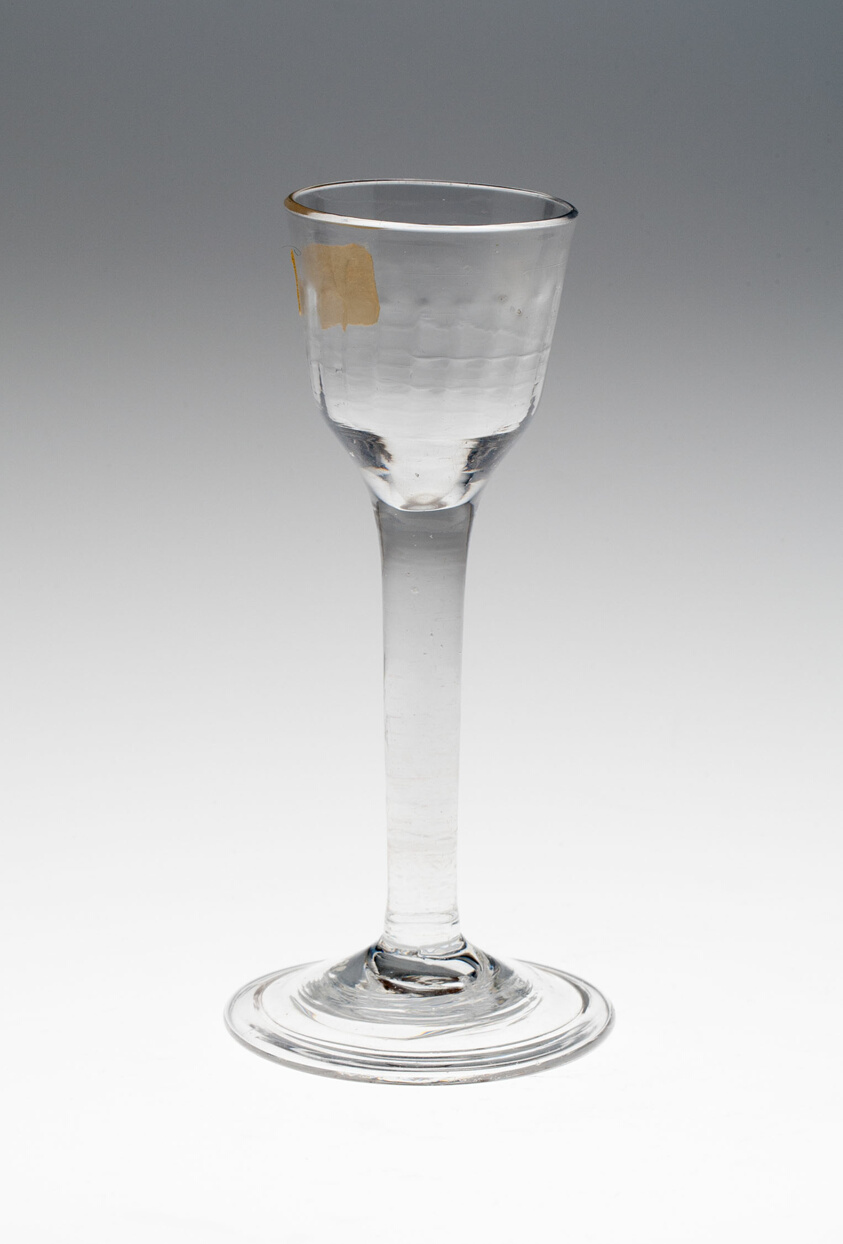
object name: Glass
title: Wine Glass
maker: England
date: c. 1760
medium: Glass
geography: England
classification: drinking vessel; glass; european decorative arts